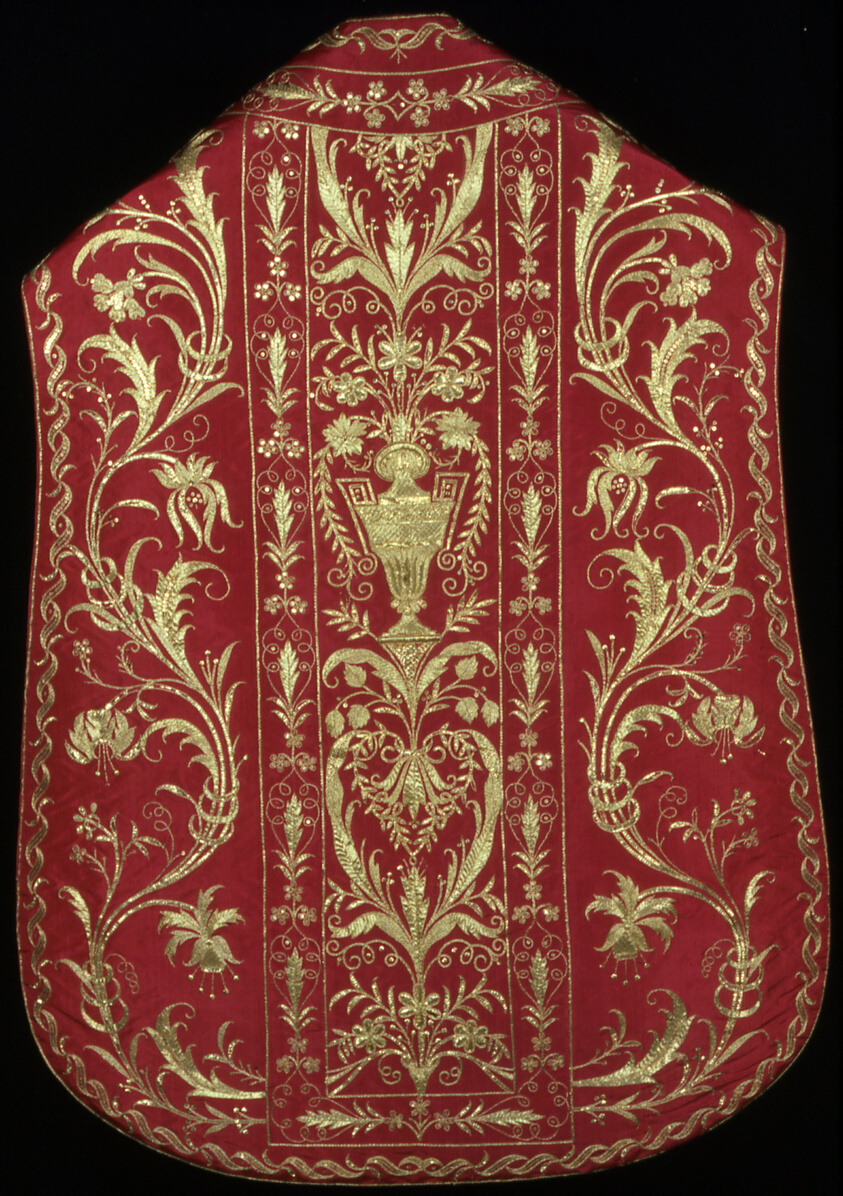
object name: Textile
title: Chasuble, Stole, Maniple, and Burse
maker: Probably Italy or France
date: 1775/1825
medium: Silk, plain weave; embroidered with silk, gilt-metal strips, spangles, and purl, and gilt-metal-strip-wrapped silk in couching and padded couching; lining and ribbons of silk, plain weave; d: lined with linen, plain weave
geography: Italy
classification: textile; costume; liturgical; needlework (visual works)